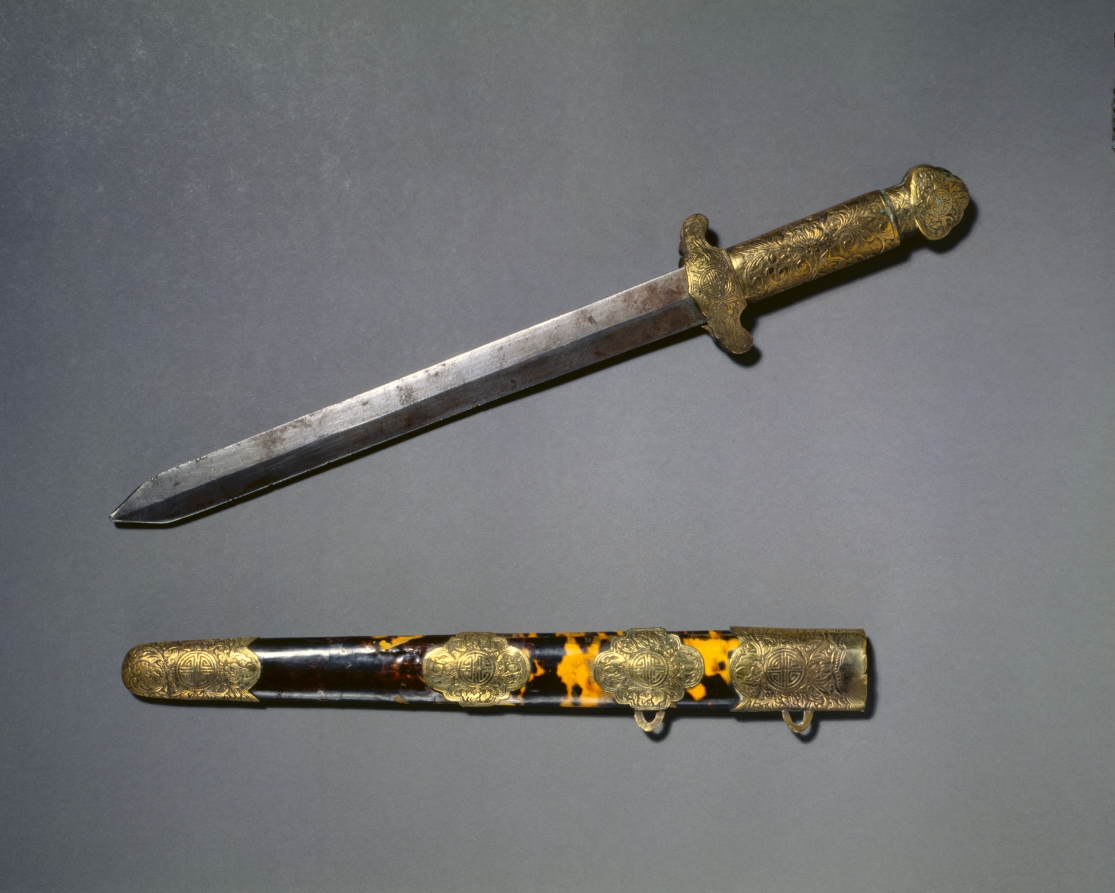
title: Dagger and Scabbard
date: 1800s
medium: metal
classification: Arms and Armor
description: This is a typical 19th-century dagger and scabbard. The material and decoration were carefully chosen for their symbolic meaning. For example, tortoise shell was chosen as the main material for the scabbard for its association with the legend of ancient heroes, while bats, the main decorative element of the brass mount, symbolize longevity and happiness.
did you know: In traditional East Asian art, bats, used here as a decorative element of the brass mount, symbolize longevity and happiness.